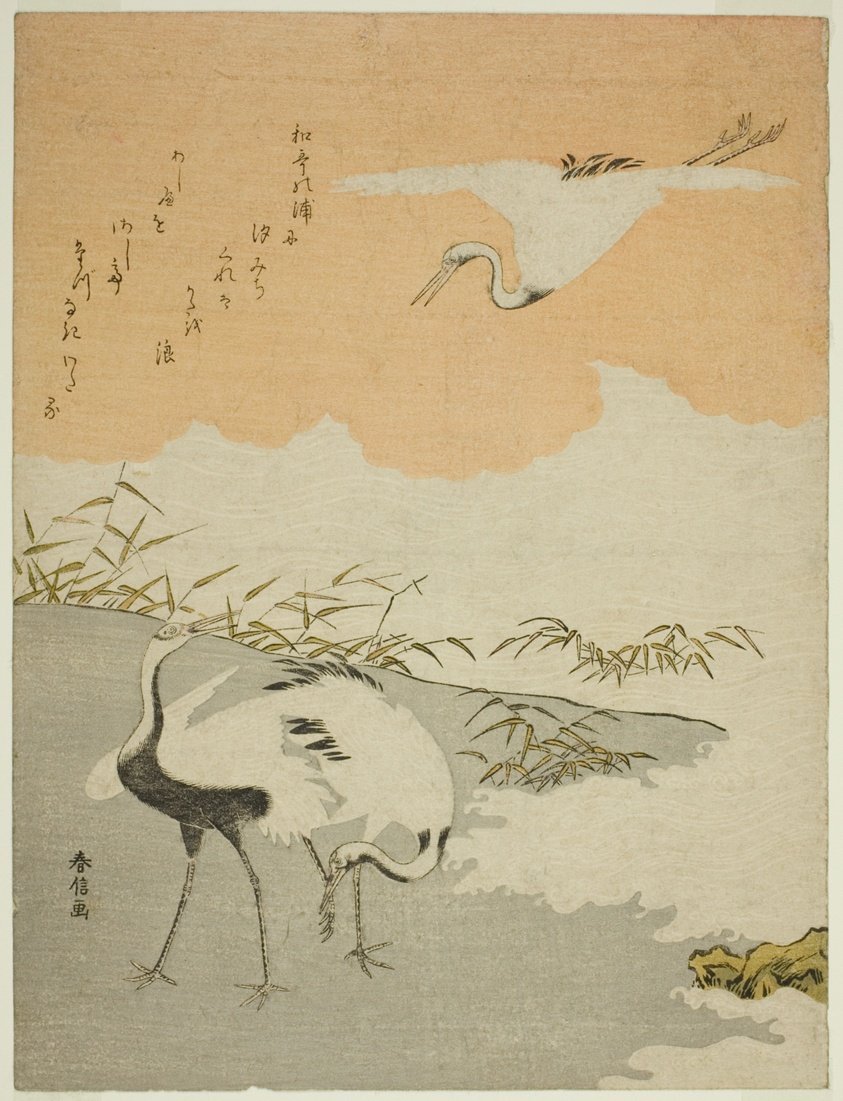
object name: Print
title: Cranes at the Sea Shore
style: Japanese (culture or style)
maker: Suzuki Harunobu 鈴木 春信; Japanese, 1725 (?)-1770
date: c. 1768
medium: Color woodblock print; chuban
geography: Japan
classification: woodblock print; print; asian art